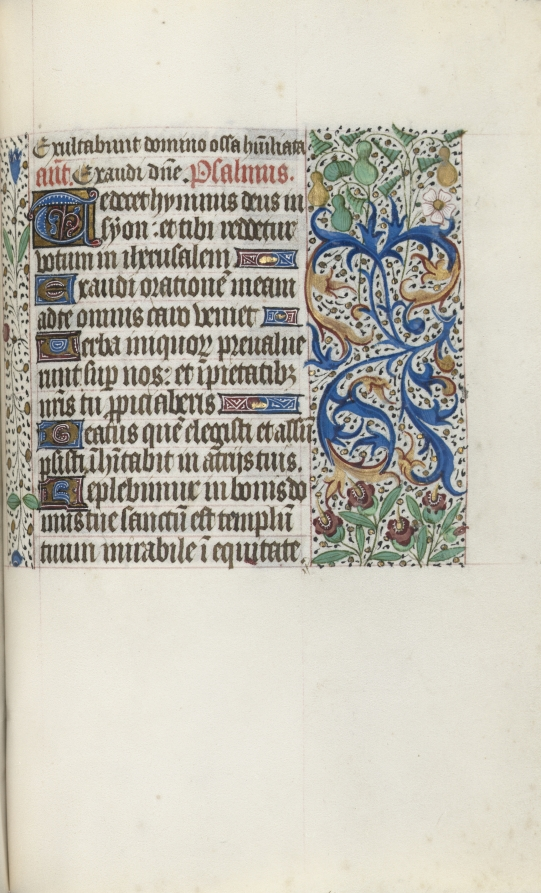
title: Book of Hours (Use of Rouen): fol. 136r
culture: France, Rouen, 15th century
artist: Master of the Geneva Latini (French, active Rouen, 1460–80)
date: c. 1470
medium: ink, tempera, and gold on vellum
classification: Bound Volume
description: In the late 1400s and early 1500s Rouen was an established and important center of book production. The city’s cathedral had a wealthy chapter that spent large sums of money to commission books and to maintain its extensive library. The stationers and booksellers would have likely been concentrated in or near the cathedral precinct. This artist, named after a manuscript now in Geneva, was Rouen’s principal illuminator during the second half of the 1400s.